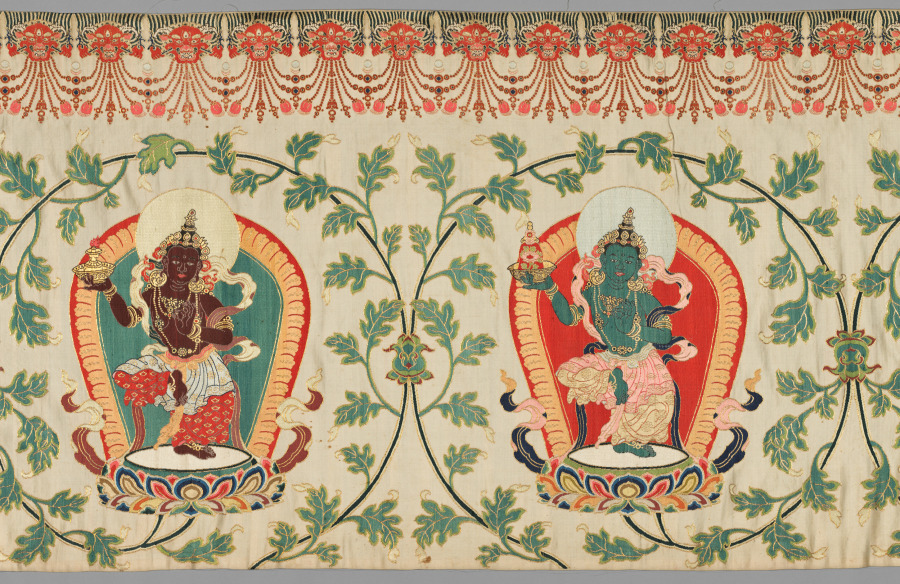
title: Brocaded Strip, known as "Imperial Tribute Brocade"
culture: China, Qing dynasty (1644-1911)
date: c. 1770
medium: brocaded satin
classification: Textile